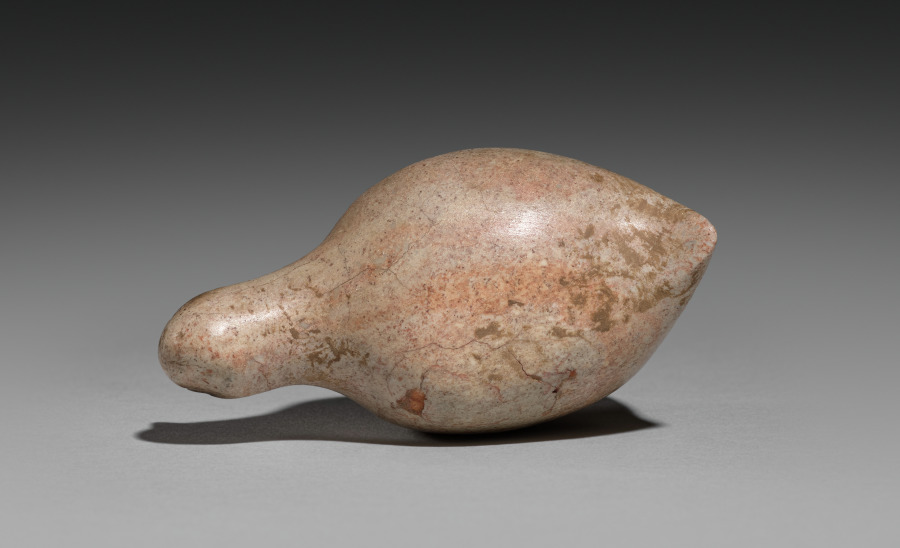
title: Nesting Quail Stamp Seal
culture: Iran, Lake Van region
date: 4000–3000 BCE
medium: dickite stone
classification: Sculpture